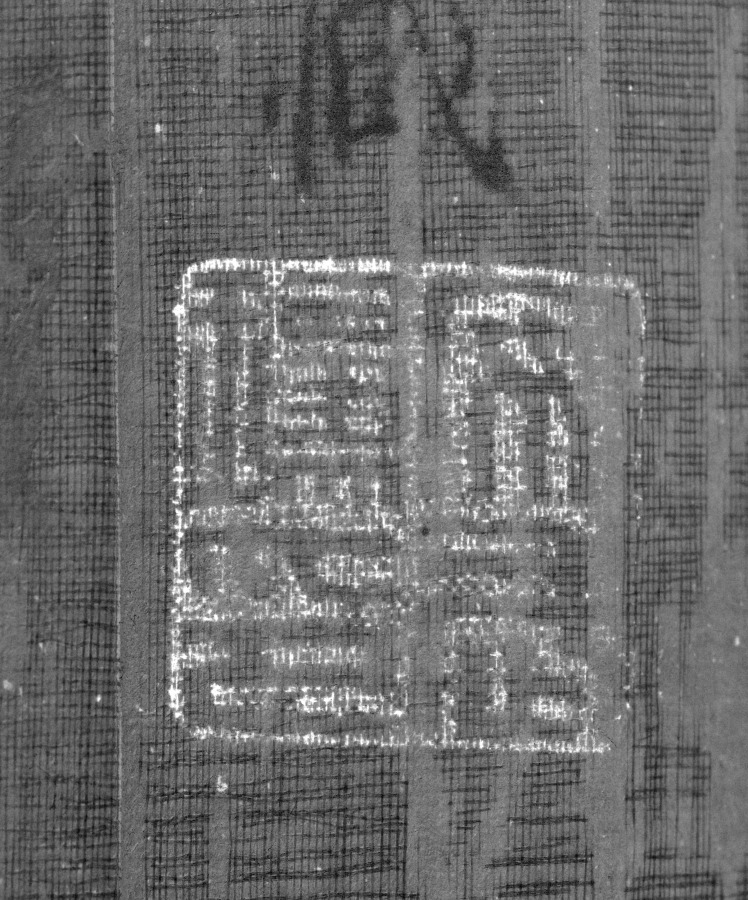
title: Landscape with Fishermen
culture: Korea, Joseon dynasty (1392–1910)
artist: attributed to Yi Bul-hae (Korean, active 1500s)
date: 1600s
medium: hanging scroll; ink and slight color on silk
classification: Painting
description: Clad in a straw rain poncho and wide-brimmed hat, a fisherman is seated in a small boat. Reeds sparkle on the far shoreline among dark, black rock forms that appear to float above the water. On the near shoreline are a pair of pines, a grove of bamboo or water reeds, and two withered deciduous trees from which moss hangs. This landscape painting, which emphasizes an intimate solitary moment through evoking various atmospheric elements—rain, evening light, and frosty air—was one of the main subjects of mid- and late 16th-century landscape paintings.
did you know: This landscape painting emphasizes an intimate solitary moment by evoking various atmospheric elements: rain, evening light, and frosty air.